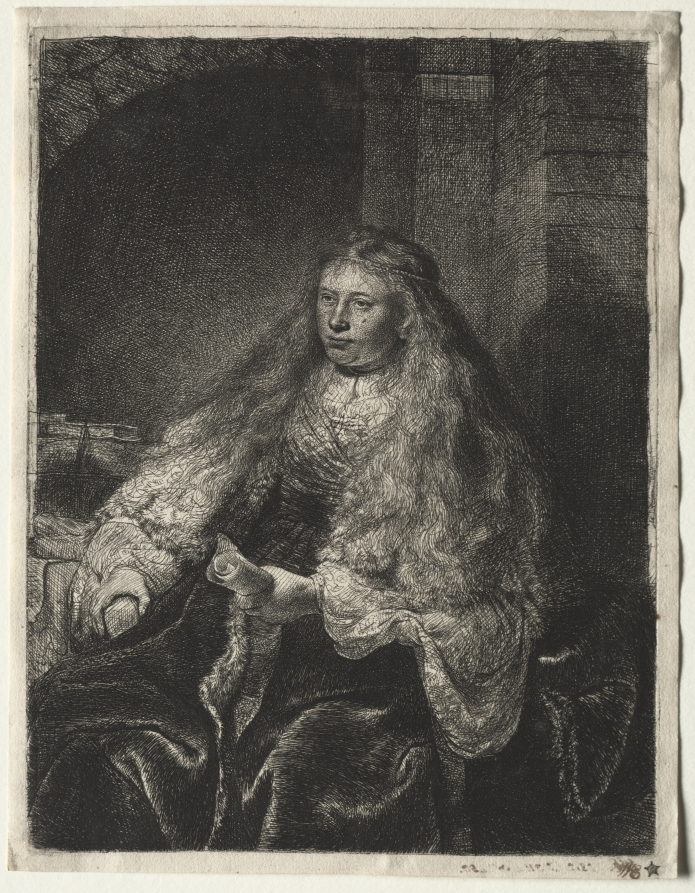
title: The Great Jewish Bride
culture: Netherlands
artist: Rembrandt van Rijn (Dutch, 1606–1669)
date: 1634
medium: etching with drypoint and engraving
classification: Print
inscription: lower left, in plate: R / 1635 [reversed] ; lower right, in pen and brown ink: WE ; VERSO, upper left, in graphite: 11[second "1" written over partially erased number "5") ; lower left, in graphite: l. x x ; lower left, in pen and brown ink: WE 1812 G311- N 450. ; lower left, in graphite: a57516